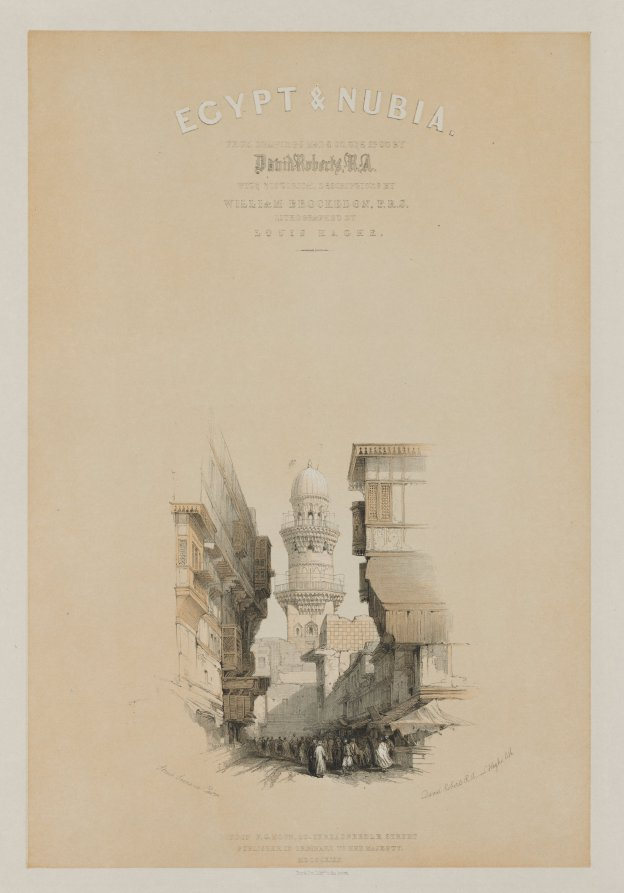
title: Egypt and Nubia, Volume I: Title Page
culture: England, 19th century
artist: Louis Haghe (British, 1806–1885)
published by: F. G. Moon, 20 Threadneedle Street, London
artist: after David Roberts (Scottish, 1796–1864)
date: 1846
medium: color lithograph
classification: Print